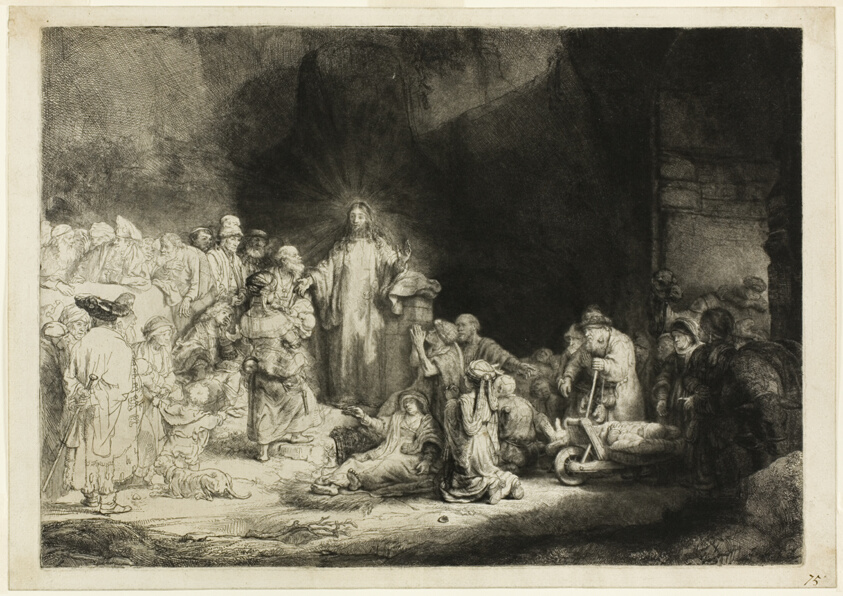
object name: Print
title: The Hundred Guilder Print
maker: Rembrandt van Rijn (Dutch, 1606-1669)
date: c. 1648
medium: Etching and drypoint on ivory laid paper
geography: Holland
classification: etching; print; prints and drawing; paper; drypoint